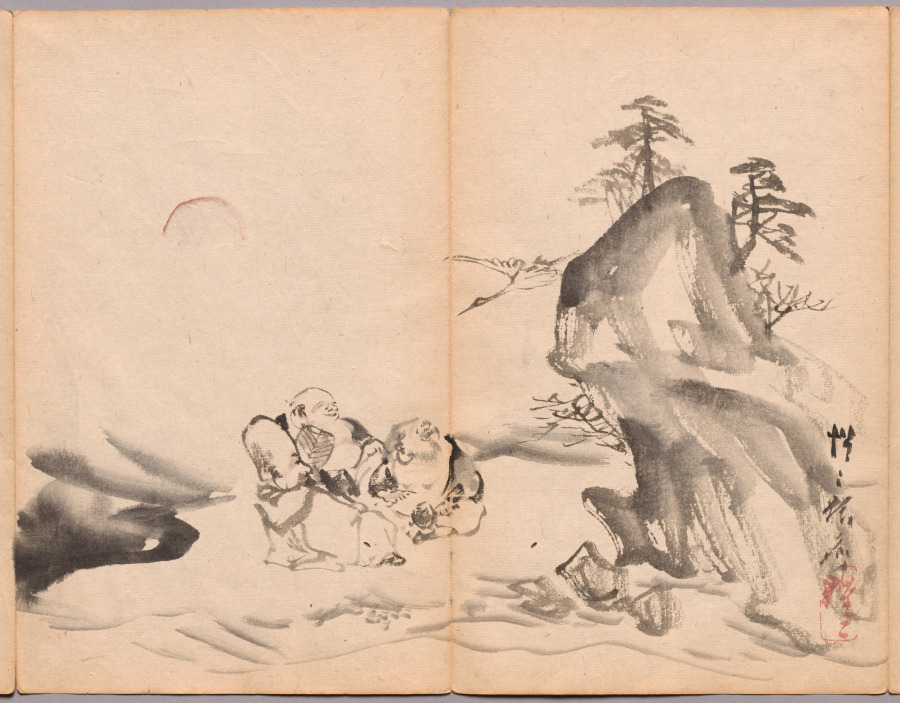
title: Gods of Fortune at Mt. Penglai from Sketch Album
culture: Japan, Edo period (1615–1868) to Meiji period (1868–1912)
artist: Kawanabe Kyōsai (Japanese, 1831–1889)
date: mid- to late 1800s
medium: Accordion-style book of 26 double-leaves; ink and color on paper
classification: Bound Volume